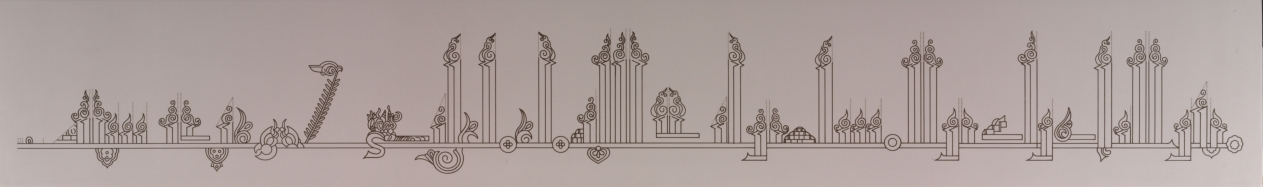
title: Tiraz of Caliph ‘Abd al-Rahman III, from the reliquary of Santa Librada, Cathedral of Seqüenza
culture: Spain, Cordoba, Spanish Umayyad period (756–1031)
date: 941–42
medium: Linen; silk: embroidery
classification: Embroidery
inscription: only the traces of a very large-scale elaborately foliated Kufic inscription preserved, largely in the form of needle holes but with a few small areas where the stitches are intact. This is approximately the second half of the original full inscription, which measured well over two meters long; the bulk of the original textile with the first half of the inscription was formerly preserved in the Cathedral of Siquenza. As preserved on the two fragments, the full inscription reads: "[Commander of the Be]lievers al-Masir li-Din al-Muslimin, may God support him! That which was made through the agency of Durri, his servant, in the year thirty and three hundred."